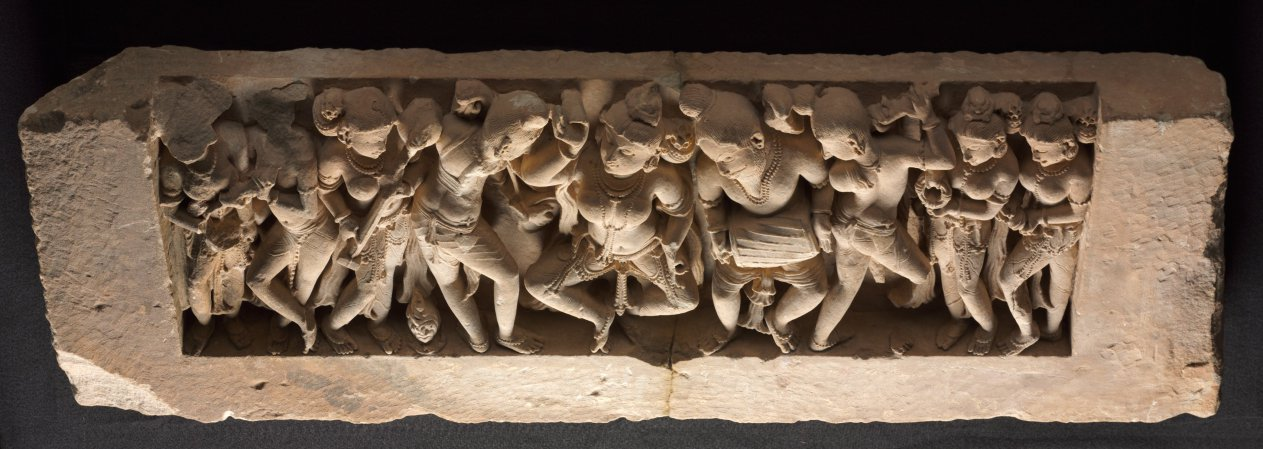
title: Frieze with Dancer and Musicians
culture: Northwestern India, Rajasthan, Sikar, Harshagiri, 10th century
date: c. 973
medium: sandstone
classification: Sculpture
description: A dancer, who strikes a pose in the center, is accompanied by a full orchestra of musicians in lively variegated poses. At the far left, a woman plays the cymbals, her mouth open in song. Twisting turning postures of figures wrought in high relief with little background space behind them are characteristics of Indian sculpture from the medieval period. Music and dance were important components of devotional temple activities; they were considered as pleasing to the divinity and attractive for devotees as the works of sculpture and architecture.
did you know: The twisting, dynamic postures of the musicians in this frieze may visually echo the joyful music they are playing together.